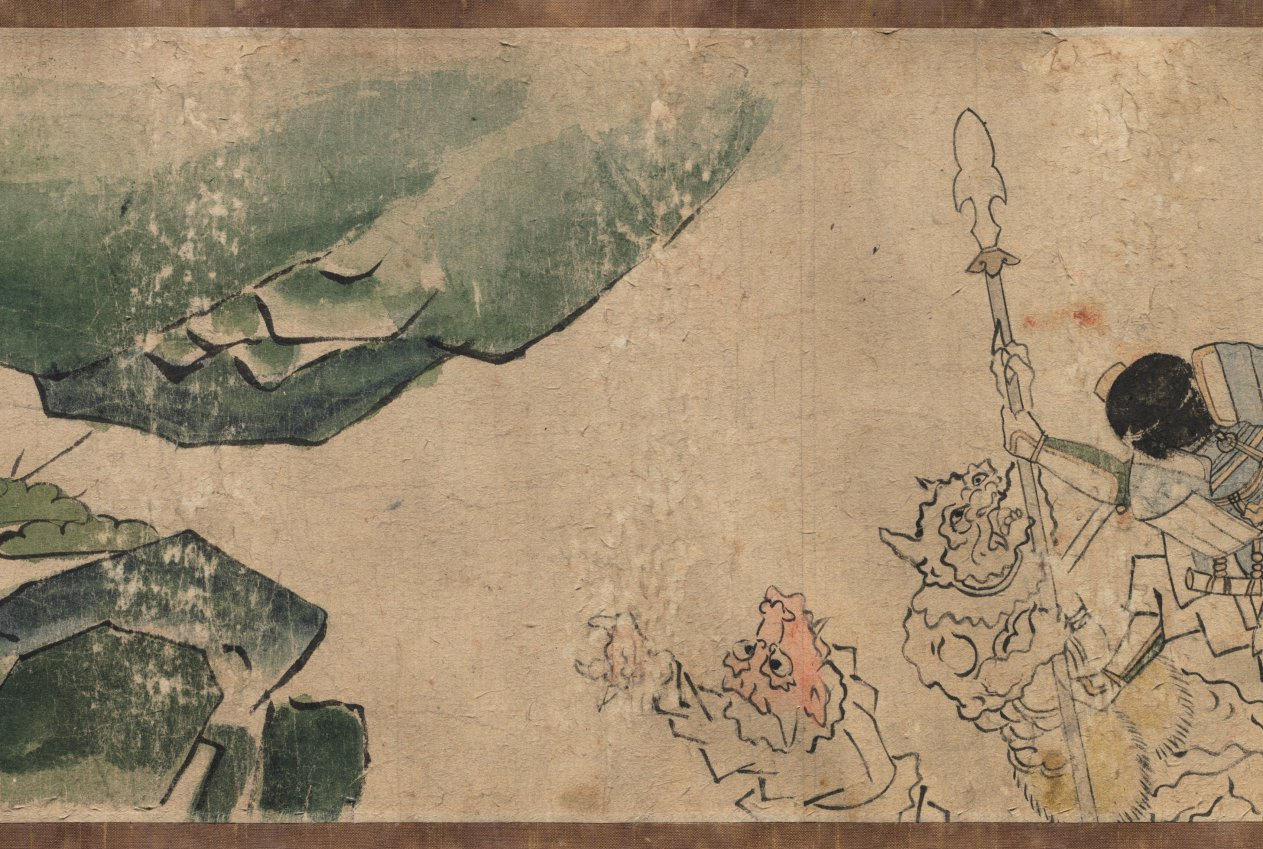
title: Oeyama Engi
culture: Japan, Edo period (1615–1868)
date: 1615–1868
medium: one of a pair of handscrolls; ink and color on paper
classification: Painting